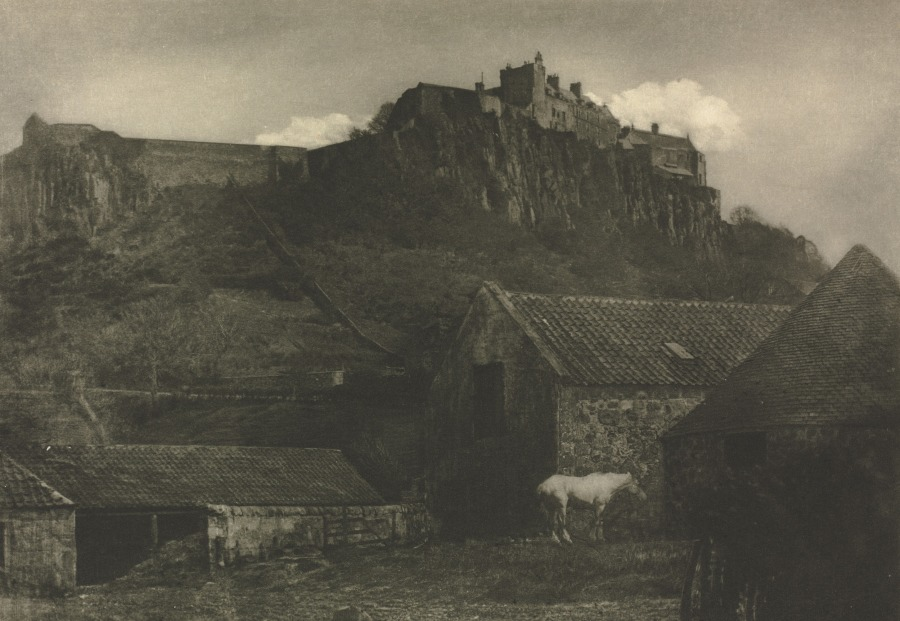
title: Camera Work: Stirling Castle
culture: England, 20th century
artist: J. Craig Annan (British, 1864–1946)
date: 1907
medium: photogravure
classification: Bound Volume